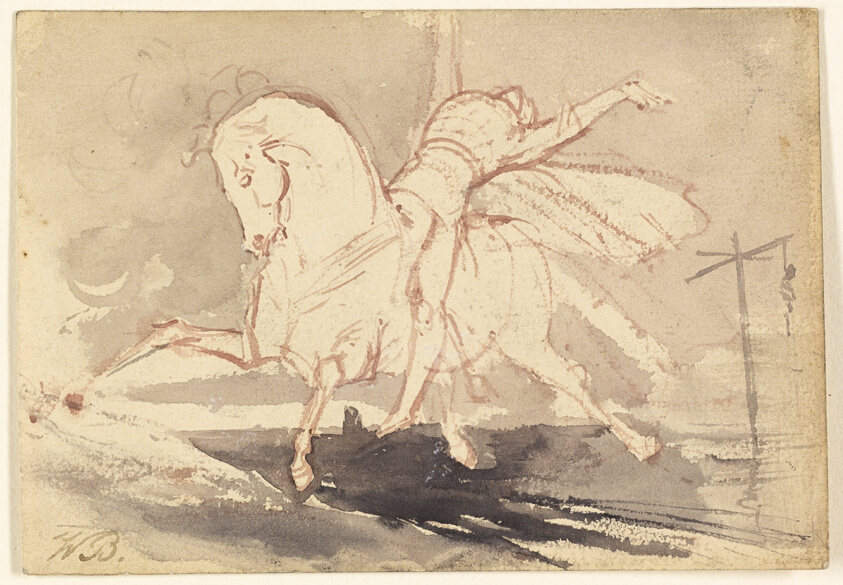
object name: Drawing and Watercolor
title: Death on a White Horse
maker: possibly Henry Fuseli (Swiss, active in England, 1741-1825); imitator of William Blake (English, 1757-1827); possibly Theodore Matthias von Holst (English, 1810-1844); style of Thomas Stothard (English, 1755-1834)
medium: Pen and brush and pink ink, with brush and gray wash, on ivory wove paper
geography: Switzerland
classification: ink or chalk wash; drawings (visual works); prints and drawing